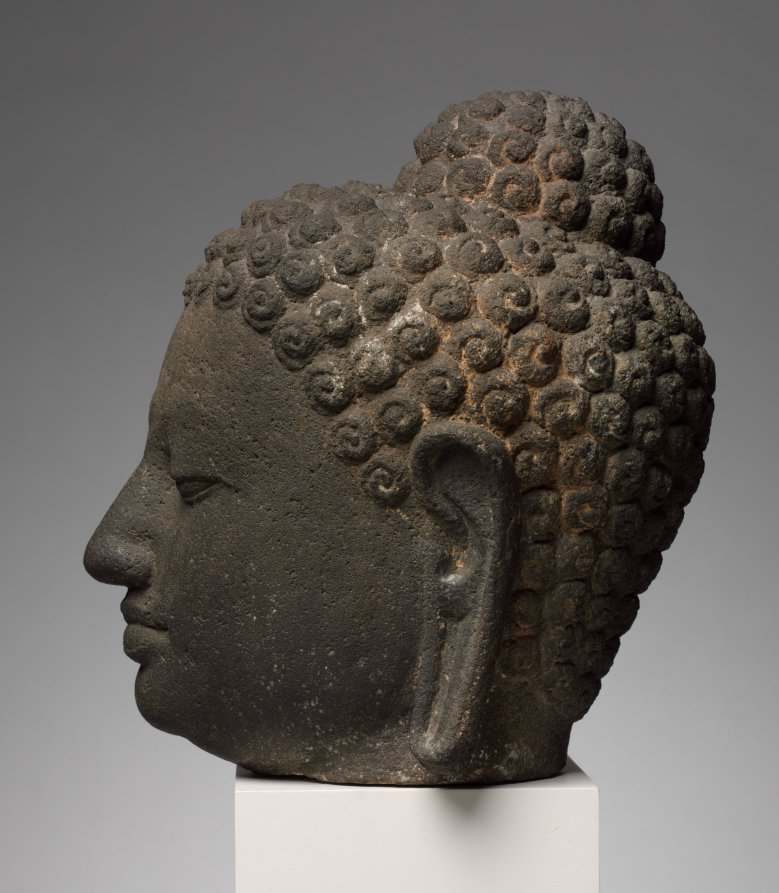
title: Head of Buddha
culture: Indonesia, Java, Borobudur, Sailendra Period, 9th Century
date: early 800s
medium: volcanic stone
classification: Sculpture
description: Serenity, tranquility, and compassion are expressively conveyed in the gently modeled, highly porous black stone of the volcanic island of Java. Borobudur, the massive, multitiered stone structure from which it came, still stands as one of the most impressive Buddhist monuments in the world. Concentric walkways with carved pilgrimage scenes lead up to vast terraces that originally had more than 500 life-size Buddha images, many of which still remain.